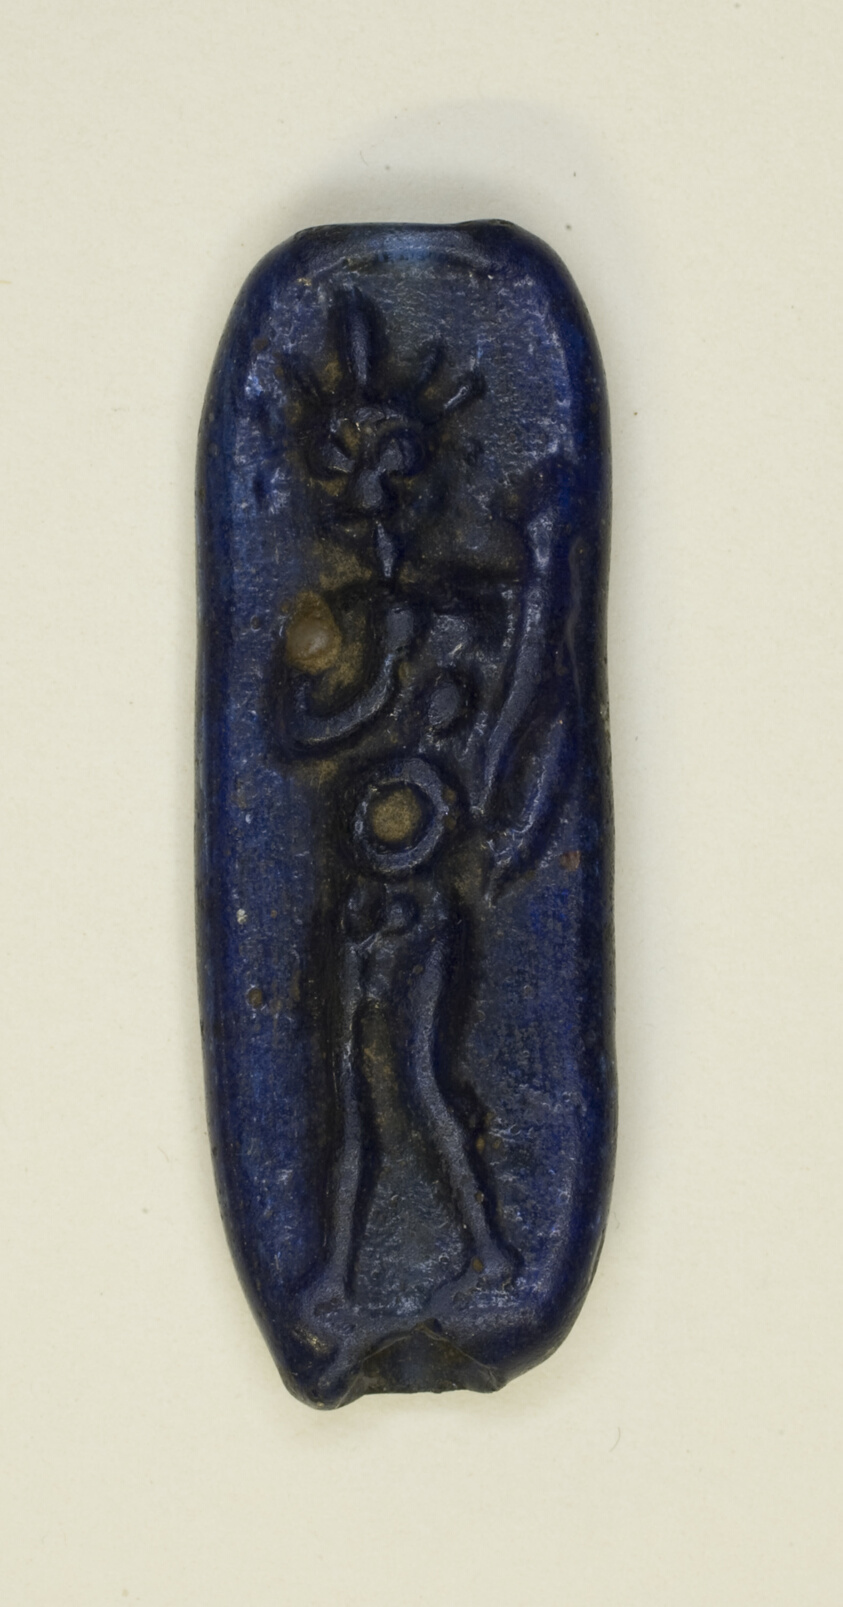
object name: Costume and Accessories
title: Amulet of the God Harpocrates or Horus-Helios with Cornucopia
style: egyptian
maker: Egyptian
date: Roman Period (30 BCE-395 CE)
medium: Glass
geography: Egypt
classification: amulet; jewelry; glass; ancient art; costume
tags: gods (deities)